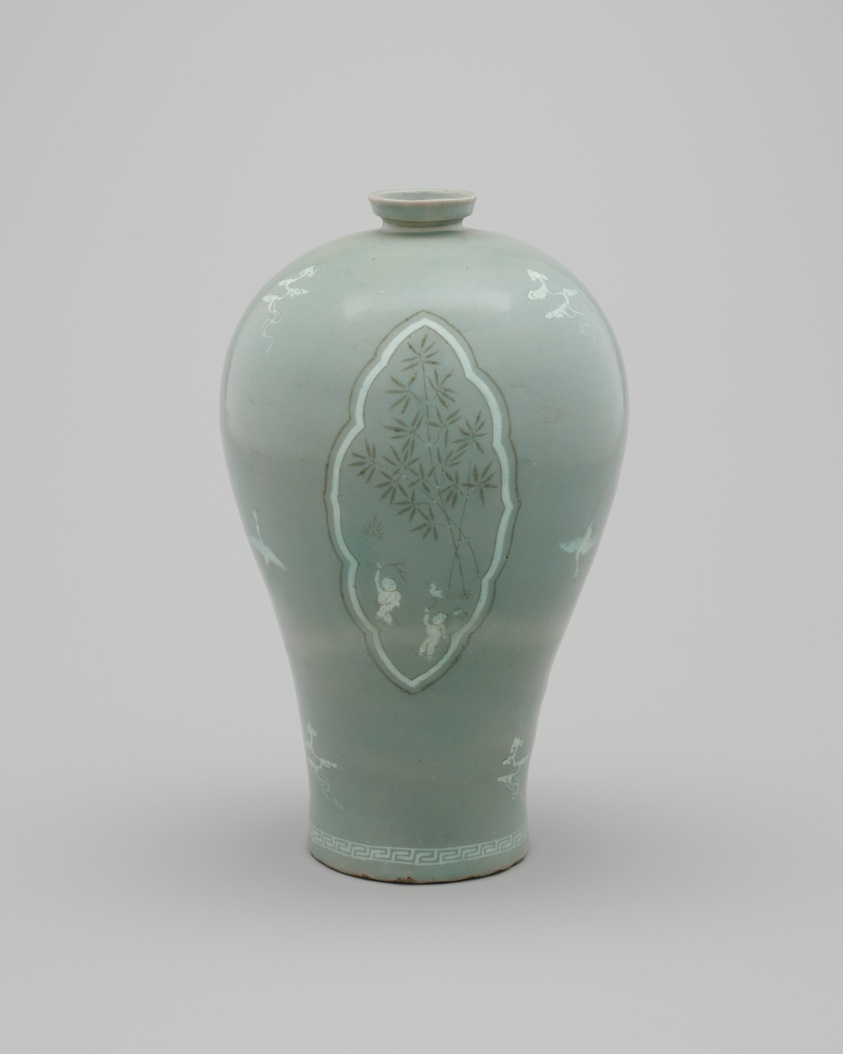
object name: Vessel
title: Plum Vase (Maebyeong) with Clouds, Cranes, and Children Motifs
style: Korean (culture or style), koryŏ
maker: Korea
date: Goryeo dynasty (918–1392), late 12th century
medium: Stoneware with red and white slip and celadon glaze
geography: Korea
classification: vase; vessel; stoneware; ceramics; asian art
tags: children, green (color), clouds, cranes, birds, animals, trees, plants, bamboo